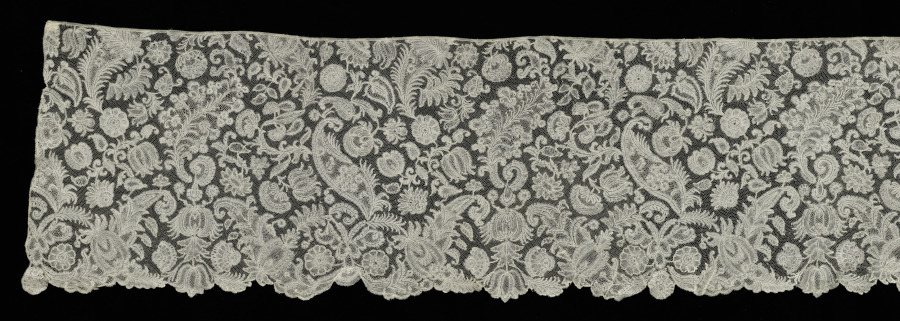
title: Lace Edging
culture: Belgium, Brussels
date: 1700s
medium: Linen: bobbin lace (Point d'Angleterre)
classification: Lace